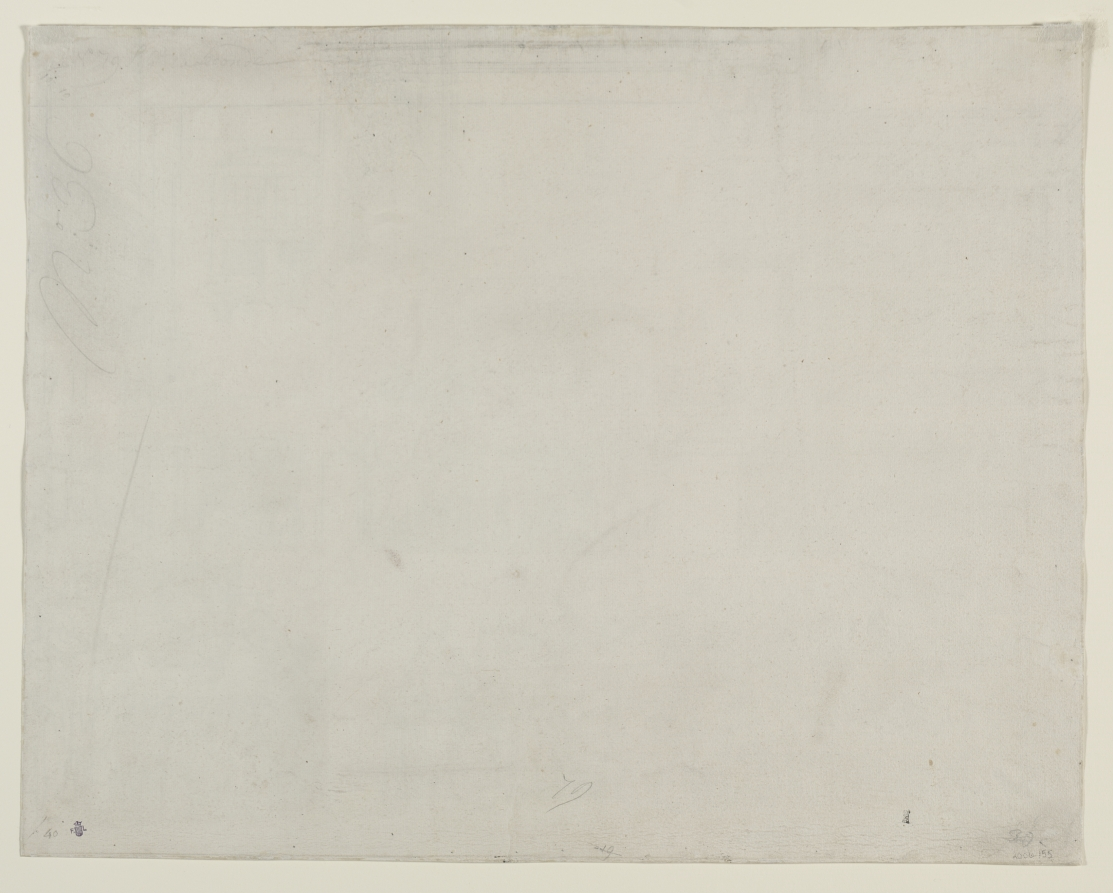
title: Ecce Homo. Christ Presented to the People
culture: Netherlands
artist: Rembrandt van Rijn (Dutch, 1606–1669)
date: 1655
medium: drypoint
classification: Print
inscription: Recto, upper left, in graphite: 79; lower left: FPS. Verso, in purple ink: Prince of Liechtenstein or Colnaghi for Liechtenstein stamp; in black ink, Zinser stamp, castle tower (rook chess piece); along side, in graphite: No. 36; along top: (illegible) name; upper left, in graphite: No 79 P(?) G (?) La Second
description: Rembrandt was an experimental and innovative printmaker and the first to execute works in pure drypoint on this monumental scale. Drypoint produces blurred lines and rich, velvety shadows, but these effects are lost as the plate wears. A limited number of rich impressions exist like this fine example of the fifth state, which demonstrates how Rembrandt redefined the expressive potential of printmaking. Rembrandt’s habit of drawing from life made him a keen observer of behavior and body language, endowing his biblical scenes with a human dimension and veracity not seen previously. The throng in Christ Presented to the People represents a cross section of the population and reflects the pictorial tradition that common humanity condemned Christ. Large areas of the imposing building, symbolizing the crushing weight and authority of the state, remain unworked so that blank white paper seems radiant in contrast to rich black shadows.